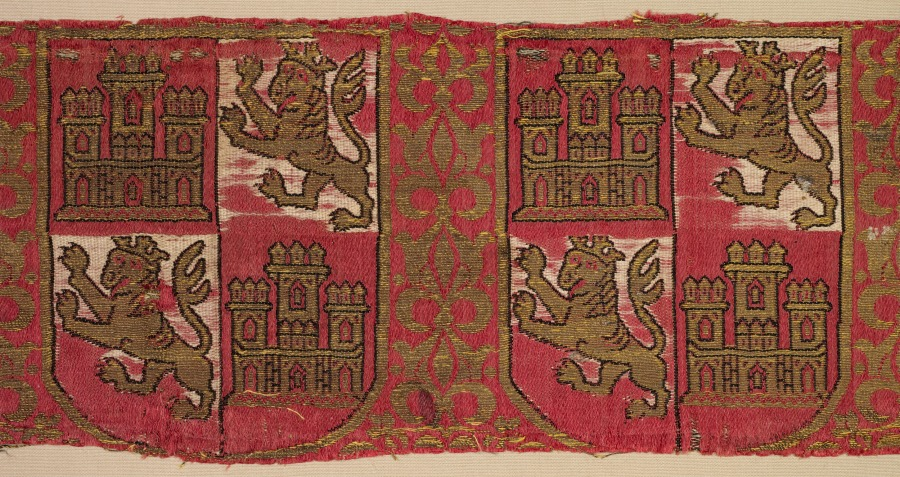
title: Lampas with heraldry of Castile and León, from a royal Christian robe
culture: Spain, Granada, Nasrid period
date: 1200–1325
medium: lampas: silk and gold thread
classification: Textile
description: Opulent gold thread forms heraldic shields of a Spanish king on a palmette ground. The shield bears the heraldic device of Castile and Leon, the castle and lion, which had decorated imperial Spanish garments for several centuries. The use of coats of arms was a European convention that was never adopted by the Muslims.